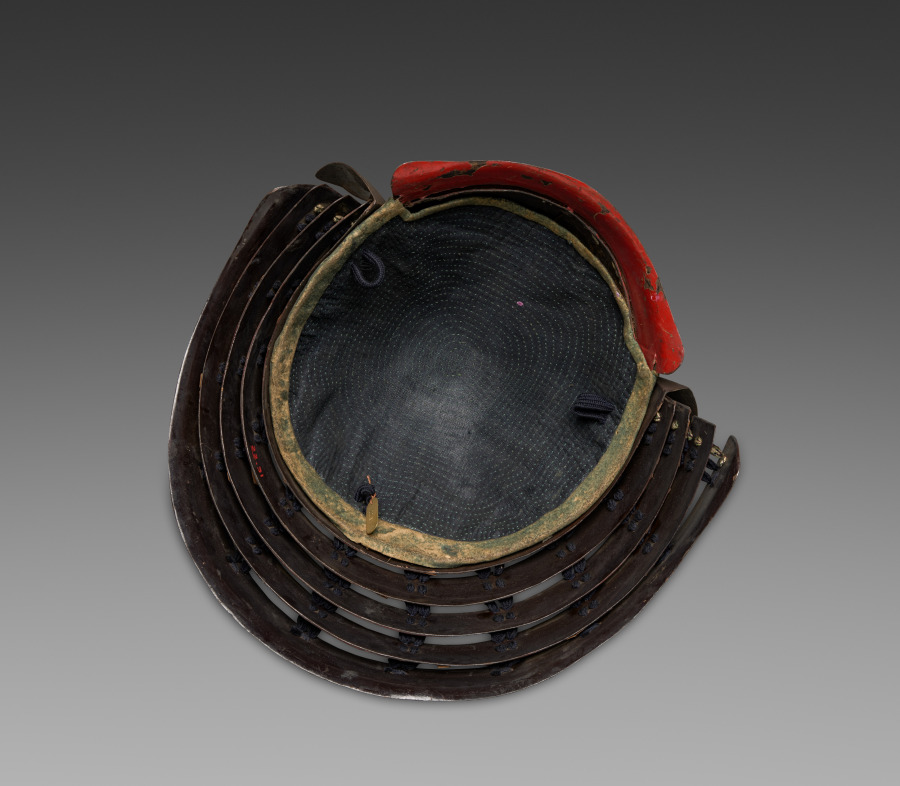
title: Helmet (Kabuto)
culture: Japan, Edo period (1615–1868)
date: 1615–1868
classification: Arms and Armor